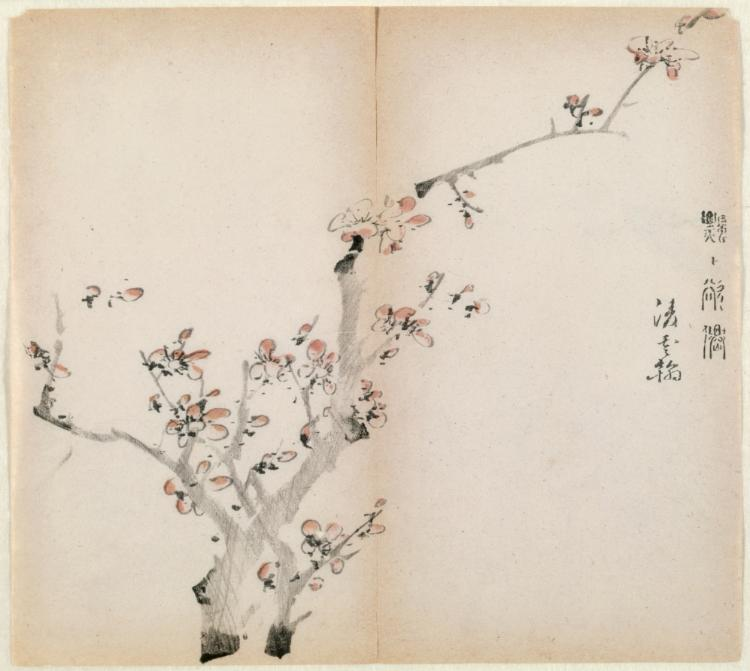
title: Peach Blossoms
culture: China, Qing dynasty (1644-1911)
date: 18th Century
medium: color woodblock print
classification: Print